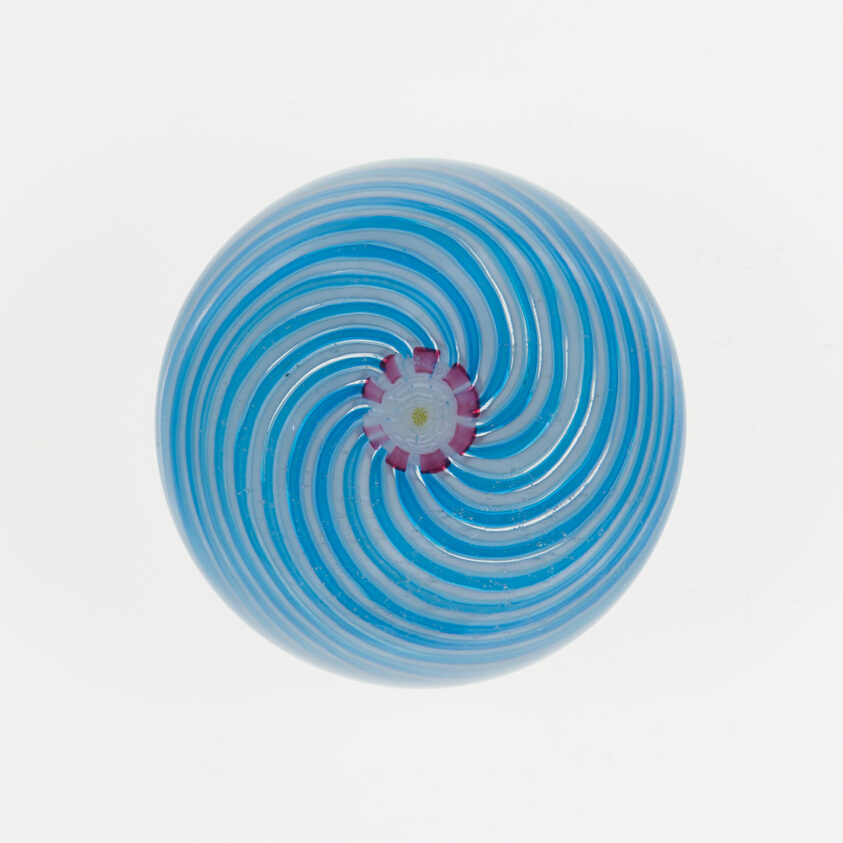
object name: Glass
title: Paperweight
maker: Clichy Glassworks (Cristalleries de Clichy); Clichy, France, 1837-1885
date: c. 1845/60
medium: Glass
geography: France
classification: paperweight; glass